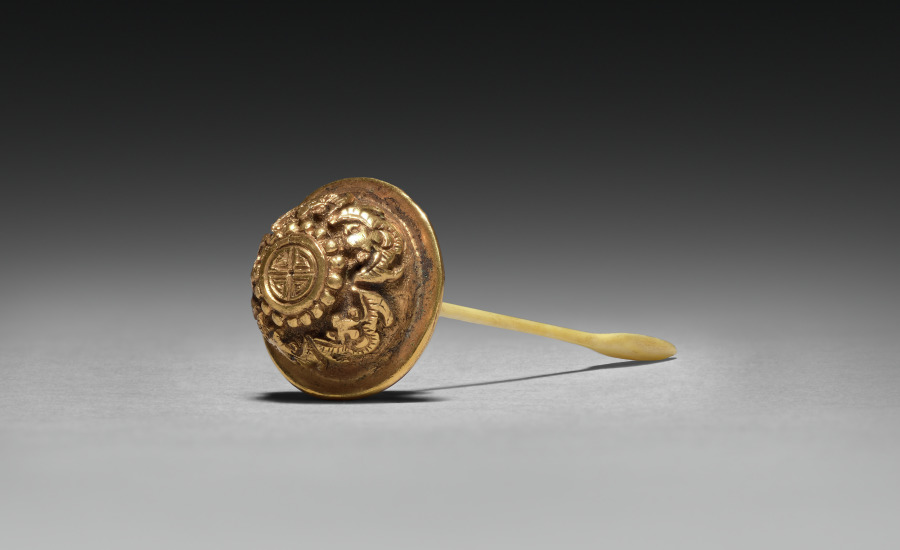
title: Snuff Bottle with European Figures (stopper)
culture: China, Qing dynasty (1644-1911), Qianlong mark and reign (1736-95)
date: 1736–95 or later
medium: painted enamel on copper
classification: Enamel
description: Snuff bottles were introduced from Europe to China around the 1700s to hold portable snuff or medicine.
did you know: The stopper is decorated with bats, which traditionally symbolize good luck, since both words (蝠 and 福) are both pronounced as fu in Chinese.